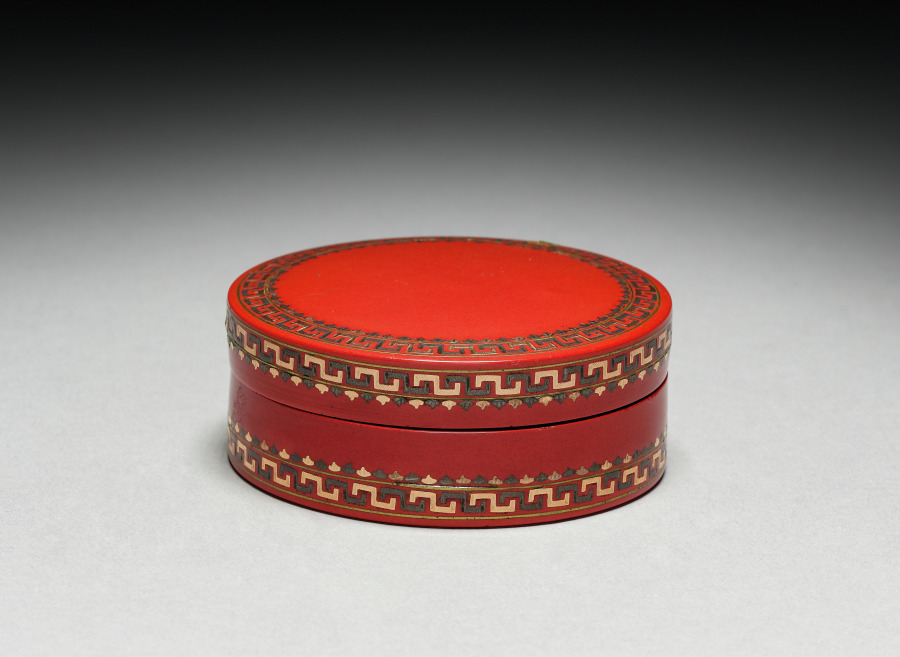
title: Round Box with Lid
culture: France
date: c. 1760–70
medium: tortoiseshell decorated in red lacquer with inlays of gold, silver, and brass wire; contains a portrait miniature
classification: Miscellaneous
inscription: miniature inscribed: annee [?]/1767.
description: This small lacquer box, made in France during the 1700s, references China in that it imitates Chinese material and craftmanship such as red lacquer and celadon. This round box with an inlaid key pattern (an interlocking geometric motif ), emulates the bright vermilion color of Chinese red lacquer, typical of Suzhou lacquer ware. The key pattern is reminiscent of the so-called Chinese thunder pattern (leiwen).